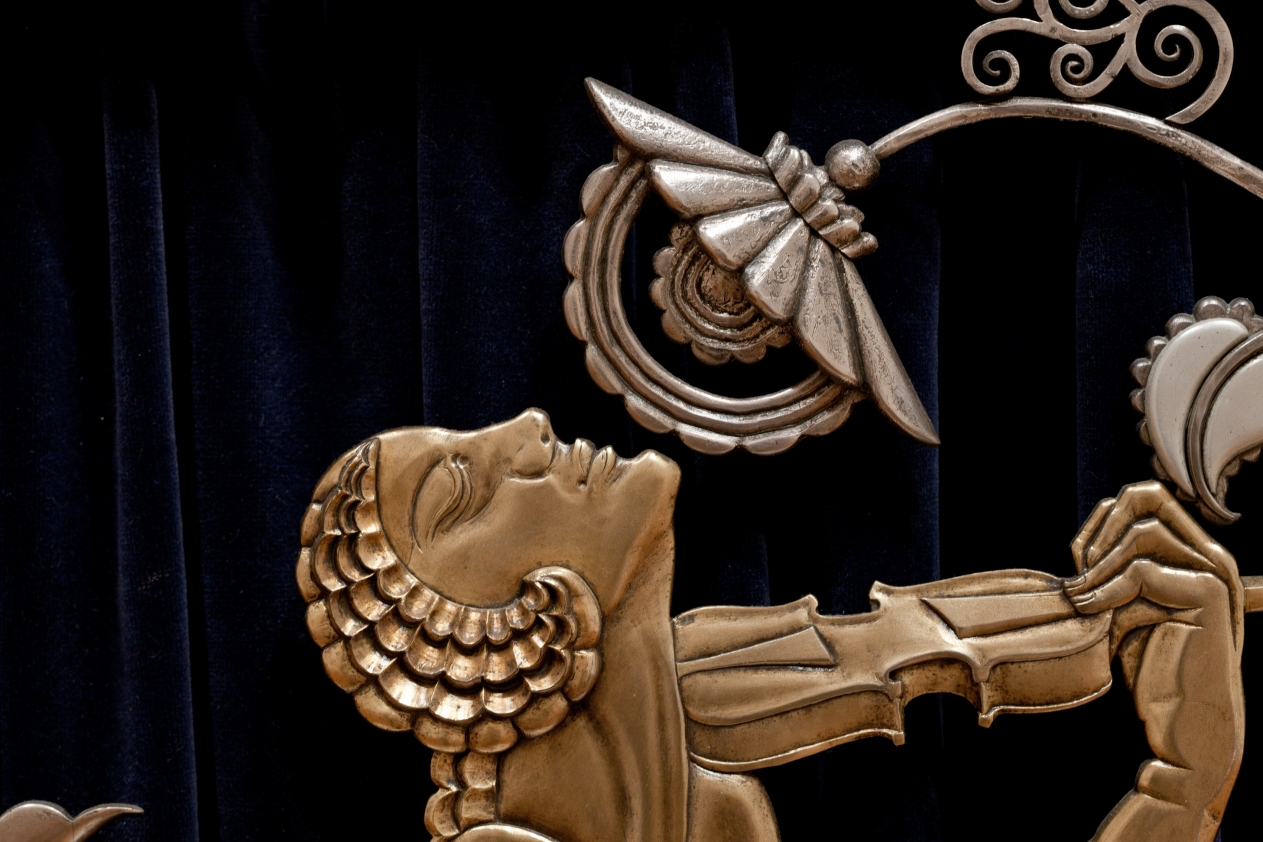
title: Muse with Violin Screen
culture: America, Ohio, Cleveland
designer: Paul Fehér (American, born Hungary, 1898–1990)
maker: Rose Iron Works (America, Ohio, Cleveland, est. 1904)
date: 1930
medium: Steel, brass; silver and gold plating, cotton velveteen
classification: Metalwork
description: Since the early years of the 20th century, the Rose Iron Works, a Cleveland supplier of architectural ornament, has produced distinguished metalwork. The company’s founder, Martin Rose, was born in Austria-Hungary and studied ornamental metalsmithing in Vienna prior to immigrating to Cleveland in 1902. In the 1920s, he hired a talented young Parisian designer, Paul Fehér, to work for the firm. Fehér’s designs, culminating in this massive screen, brought a modern European sensibility to the Rose Iron Works production. With its geometric patterning, highly stylized and abstracted natural forms, and the central figure reminiscent of the celebrated jazz singer Josephine Baker, this screen reflects the classic motifs of Art Deco design.